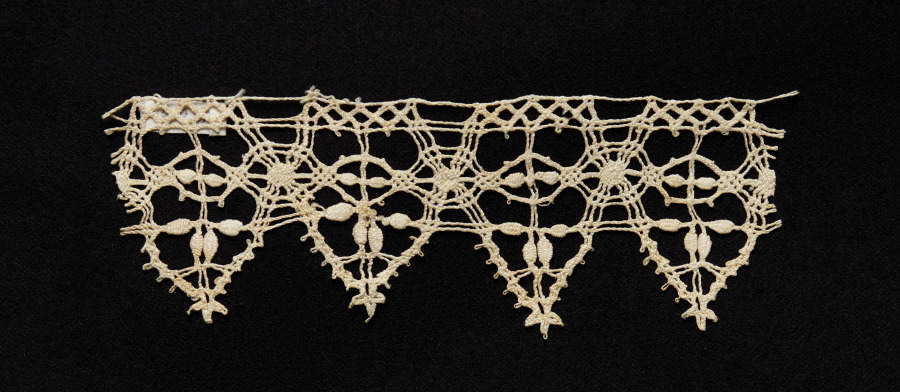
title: Lace Edging of Points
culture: Italy, Genoa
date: 1550–99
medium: Bobbin lace (needle lace [reticella] design)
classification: Lace